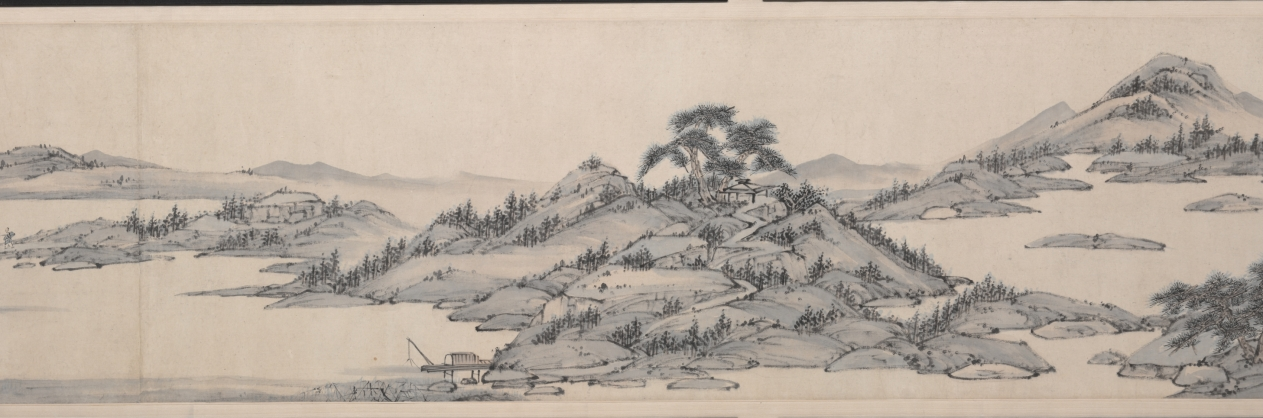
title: Pure Tones among Hills and Waters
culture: China, Qing dynasty (1644-1911)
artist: Xiao Yuncong (Chinese, 1596–1673)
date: 1664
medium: Handscroll; ink and light color on paper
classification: Painting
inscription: 種松發秀色，具是高人心。/ 鑿石築茅屋，長年覆綠陰。/ 白雲無意出，舒卷趨空林。/ 萬籟時一寂，微風墮清音。/ 此情莫可擬，此景誰能論。/ 只向千峰裏，共彈五絃琴。/ 桃花依綠水，不覺又春深。 甲辰花朝題于青蓮閣, 鐘山老人蕭雲從。[印] 鐘山老人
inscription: Title and inscription, dated 1744, and 3 seals of Shen Feng 沈鳳 (1685-1755).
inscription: 4 colophons and 24 additional seals: 1 colophon, dated 1811, and 5 seals of Xiang Yuan 項源 (active about 1811); 1 colophon, dated 1858, and 2 seals of Qi Junzao 祁寯藻 (1793-1866); 1 colophon and 4 seals of Zhang Yunzhong 張允中 (1881–1960?); 4 seals of Jiang Xun 江恂 (active about 1753–after 1780); 1 colophon dated 1943, and 2 seals of Wang Shaoming 汪兆銘 (Wang Jingwei 汪精衛, 1883–1944); 1 seal of Qi Zhiliu 祁之鏐 (active about 1858); 2 seals of Yu Zhimeng 俞芷盟 (second half of 19th century); 4 seals unidentified.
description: Painted at age 68, this landscape is one of Xiao Yuncong’s most mature works. Extraordinary in its combination of fine details with bold brushstrokes and bluish washes, it is also one of his longest compositions in handscroll format, extending over 23 feet. Throughout his lifetime, Xiao visited Nanjing and Yangzhou, where he met with other painters and literati. Regarded as the founder of the Gushu school (姑孰派) of painting, Xiao painted from nature, and his landscapes are informed by his travels, as well as by his experience as a print designer.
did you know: Biographical notes on Xiao Yuncong relate that he did not pursue the career of an official, but "furnished a cottage in the eastern suburbs [of Wuhu in Anhui province] and amused himself playing the qin (zither) and reading every day."